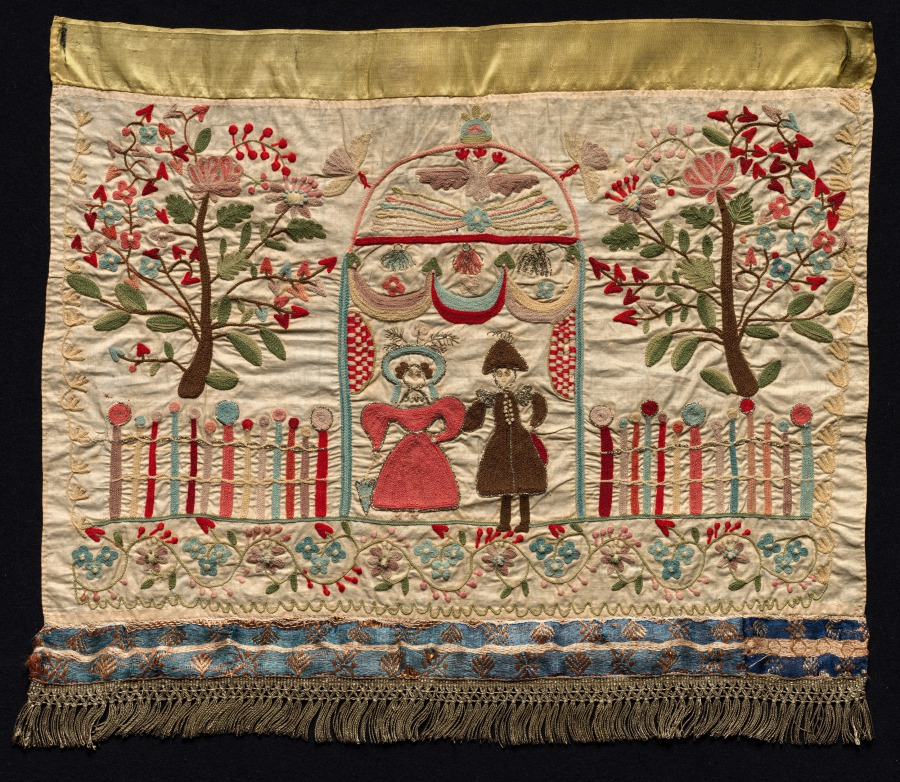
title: Towel End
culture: Russia, Nizhny-Novgorod province, early 19th century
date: c. 1800–1825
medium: Linen: plain weave ground; wool; metal thread: embroidery, chain stitch; silk: ribbon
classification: Embroidery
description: This Russian embroidered panel was likely used to embellish the end of a bathing towel. Textiles of this type are valuable for their fine embroidery of ancient folk motifs, ritual significance, exemplification of the role of textiles in their society, and in this case, connection to a prominent woman collector, Natalia de Shabelsky, without whom this textile and others like it might have been lost.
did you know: Embroidering the ends of everyday towels was a common folk tradition in many cultures because it displayed the skill of the mother or daughter who stitched them.